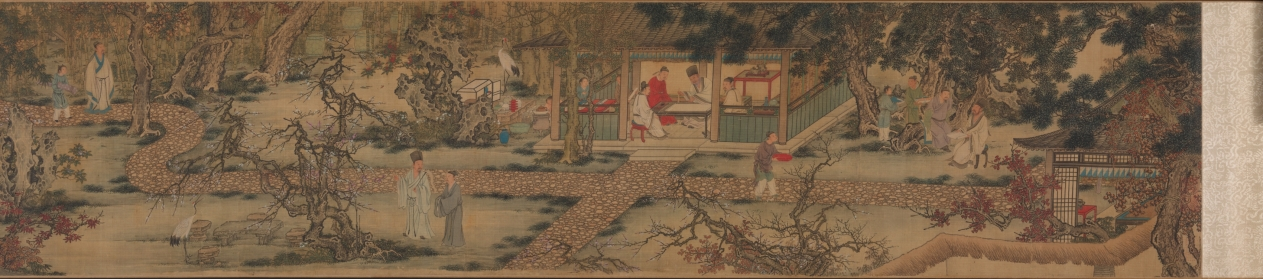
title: The Nine Elders of the Mountain of Fragrance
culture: China, Ming dynasty (1368–1644)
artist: attributed to Xie Huan (Chinese, c. 1370-c.1450)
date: 1426–52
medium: handscroll, ink and color on silk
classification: Painting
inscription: 4 seals: 2 of Xiang Yuanbian 項元汴 (1525–1590); 1 of the Qianlong Emperor (r. 1736-95); 1 of C. C. Wang 王季遷 (1907–2003)